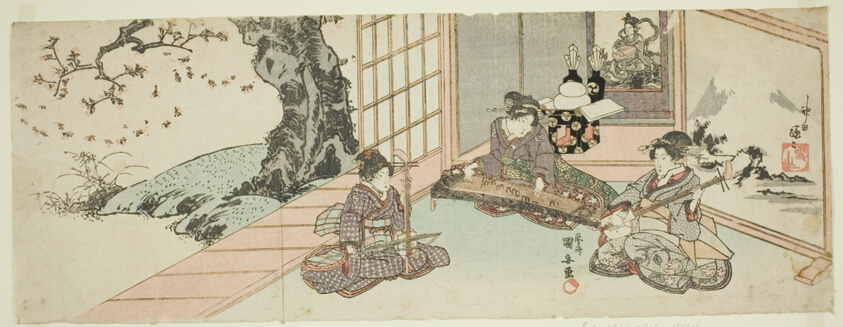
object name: Print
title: Ladies Playing Instruments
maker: Utagawa Kuniyasu (Japanese, 1794-1832)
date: early 19th century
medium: Color woodblock print; long surimono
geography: Japan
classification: woodblock print; print; asian art